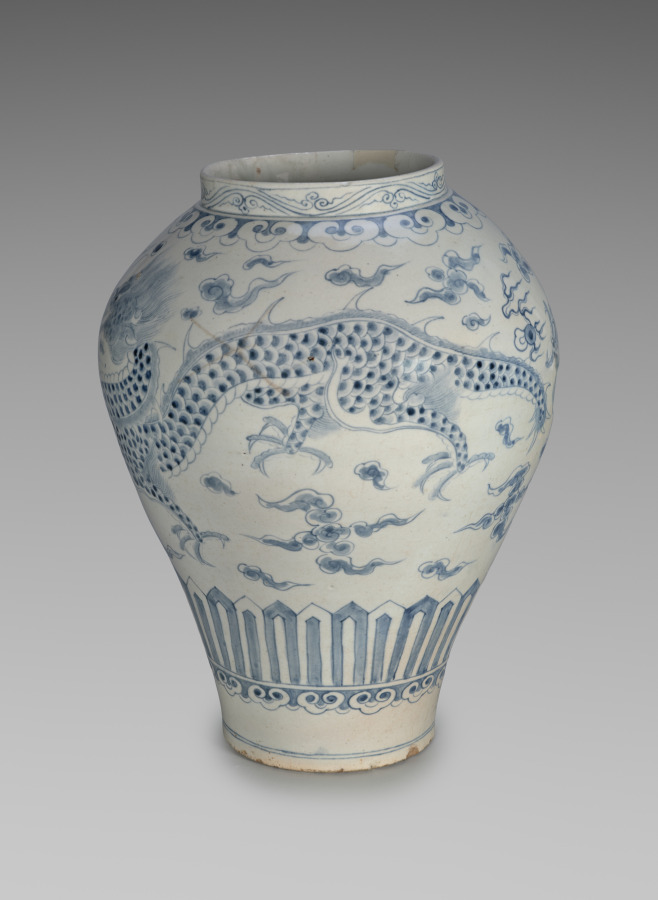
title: Jar with Dragon Design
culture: Korea, Joseon dynasty (1392–1910)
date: 1700s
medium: porcelain with underglaze blue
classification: Ceramic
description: As a mythical creature believed to make rain, the dragon served as a symbol of rulers in premodern East Asia. Here, a cobalt blue dragon is depicted flying through clouds to catch a flaming, wish-granting jewel called a cintamani. In the royal court, the shorter type of dragon jar held wine, while the tall type, like this one, held flowers. This porcelain once belonged to Robert W. Moore, who developed an interest in Korean art while serving in the US Army in South Korea during the 1950s and 1960s. Later, the CMA acquired this important work through an auction sale in 1986.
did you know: A mythical creature believed to have the power to make rain, the dragon is a prominent symbol of rulers in premodern East Asia; the image of dragons was used exclusively for the king's paraphernalia.